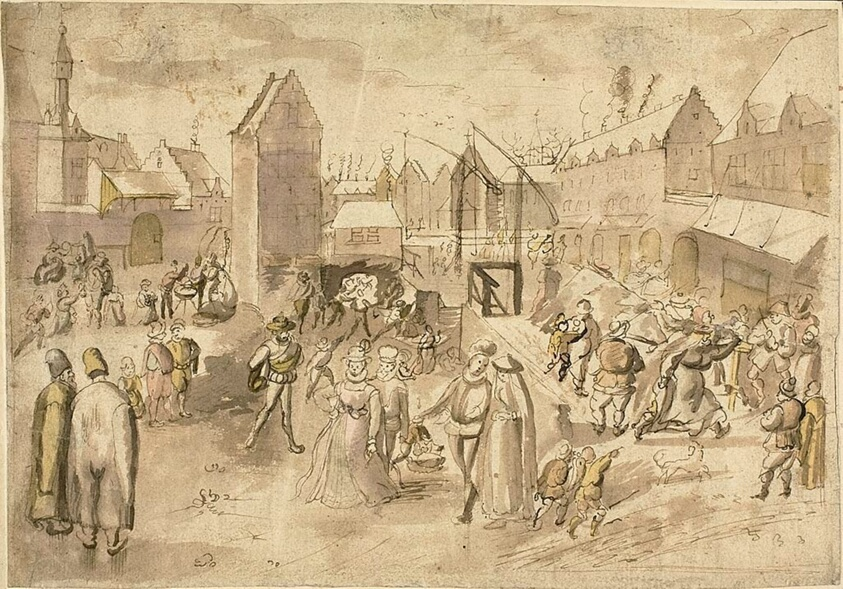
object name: Drawing and Watercolor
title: Street Scene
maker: Unknown Artist (possibly French); possibly after Denis van Alsloot (Flemish, 1570-1633)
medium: Pen and brown ink with brush and brown wash and watercolor on gray laid paper, laid down on card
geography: France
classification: ink or chalk wash; drawings (visual works); prints and drawing